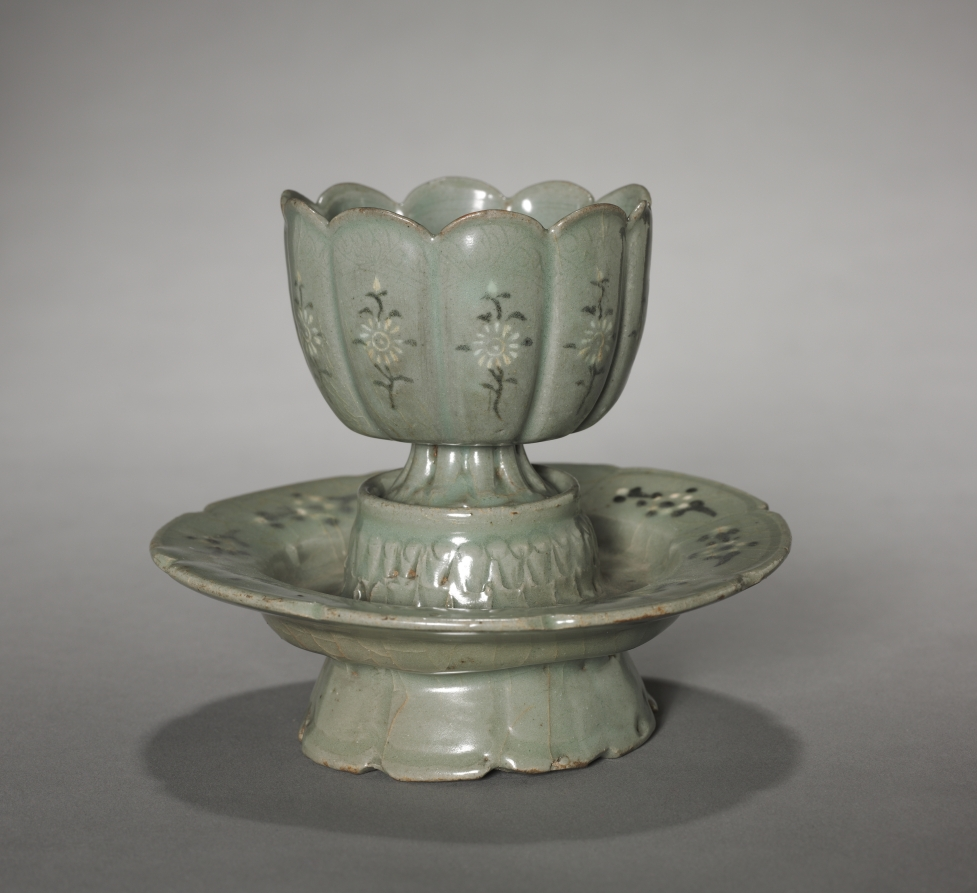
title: Floral-shaped Cup and Saucer with Inlaid Chrysanthemum Design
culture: Korea, Goryeo dynasty (918–1392)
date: 1100s-1200s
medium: Celadon ware with inlaid white and black slip decoration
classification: Ceramic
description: In Korea, chrysanthemum flowers and leaves were made into both tea and wine. Chrysanthemum wine was enjoyed during the the Double Nine Festival (the ninth day of the ninth month in the lunar calendar) praying for longevity. The flower design on the saucer is less delicate than the cup, suggesting that the cup and saucer originally were not related to each other.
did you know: Elites of the Goryeo period are known for their love of drinking tea and wine. In Korea, chrysanthemum flowers and leaves were made into both tea and wine.